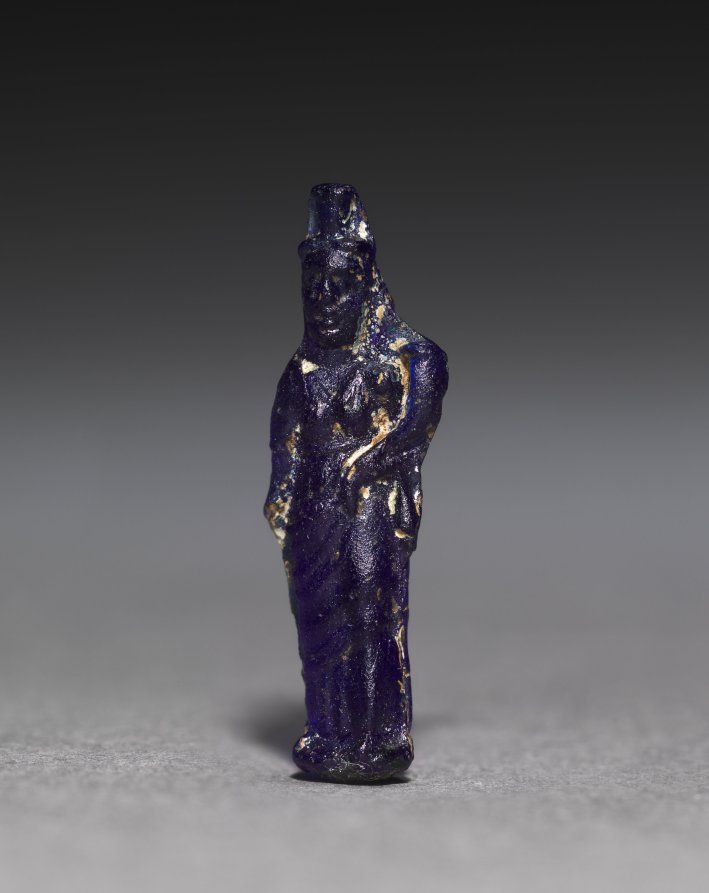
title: Amulet of Isis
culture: Egypt, Greco-Roman period (332 BCE–395 CE), Roman empire (30 BCE–395 CE)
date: 100 BCE–100 CE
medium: deep blue glass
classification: Amulets